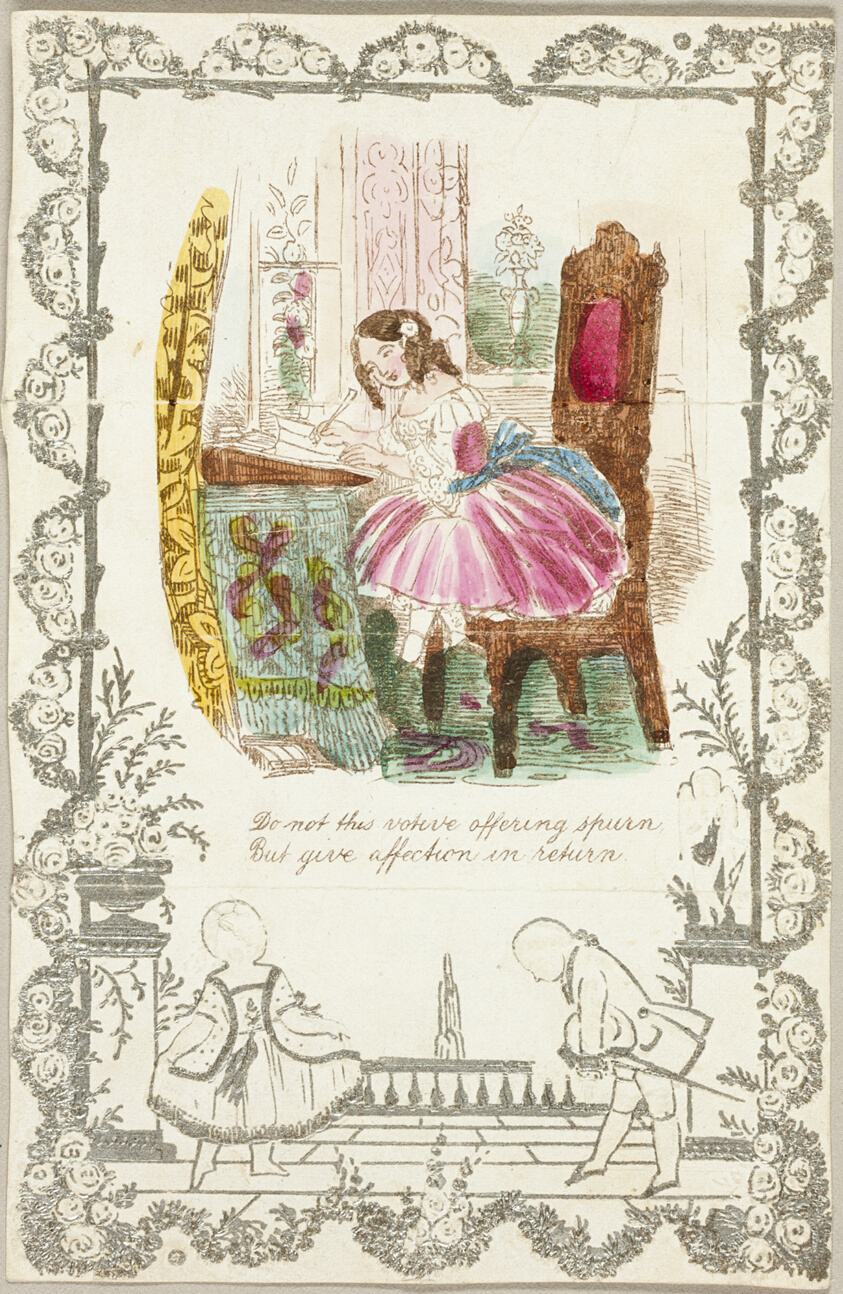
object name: Print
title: Do Not this Votive Offering Spurn (valentine)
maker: Unknown Artist; American or English, 19th century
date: 1850/59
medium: Lithograph with hand-coloring and silver paint on embossed ivory wove paper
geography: United States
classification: collage; valentine; prints and drawing; print